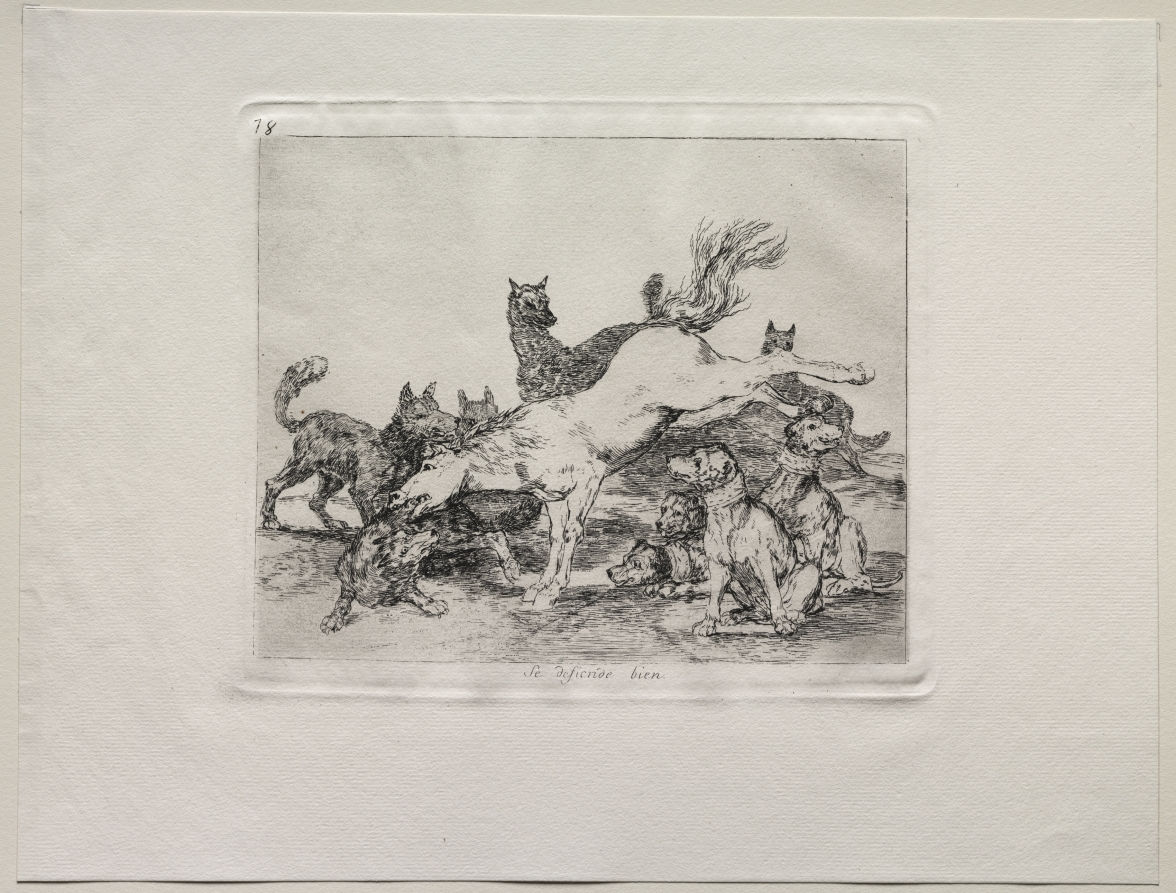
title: The Horrors of War: He Defends Himself Well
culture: Spain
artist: Francisco de Goya (Spanish, 1746–1828)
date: c. 1810–20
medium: etching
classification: Print